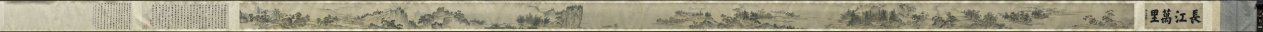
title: Ten Thousand Li of the Yangzi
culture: China, Ming dynasty (1368–1644)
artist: Dai Jin (Chinese, 1388–1462)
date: c. 1400s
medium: Handscroll; ink and color on paper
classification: Painting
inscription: Two colophons at end. Artist's seals: Dai Jin 戴進 and Wenjin 文進.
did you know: Dai Jin is traditionally considered the founder of the Zhe School, a style of landscape painting.